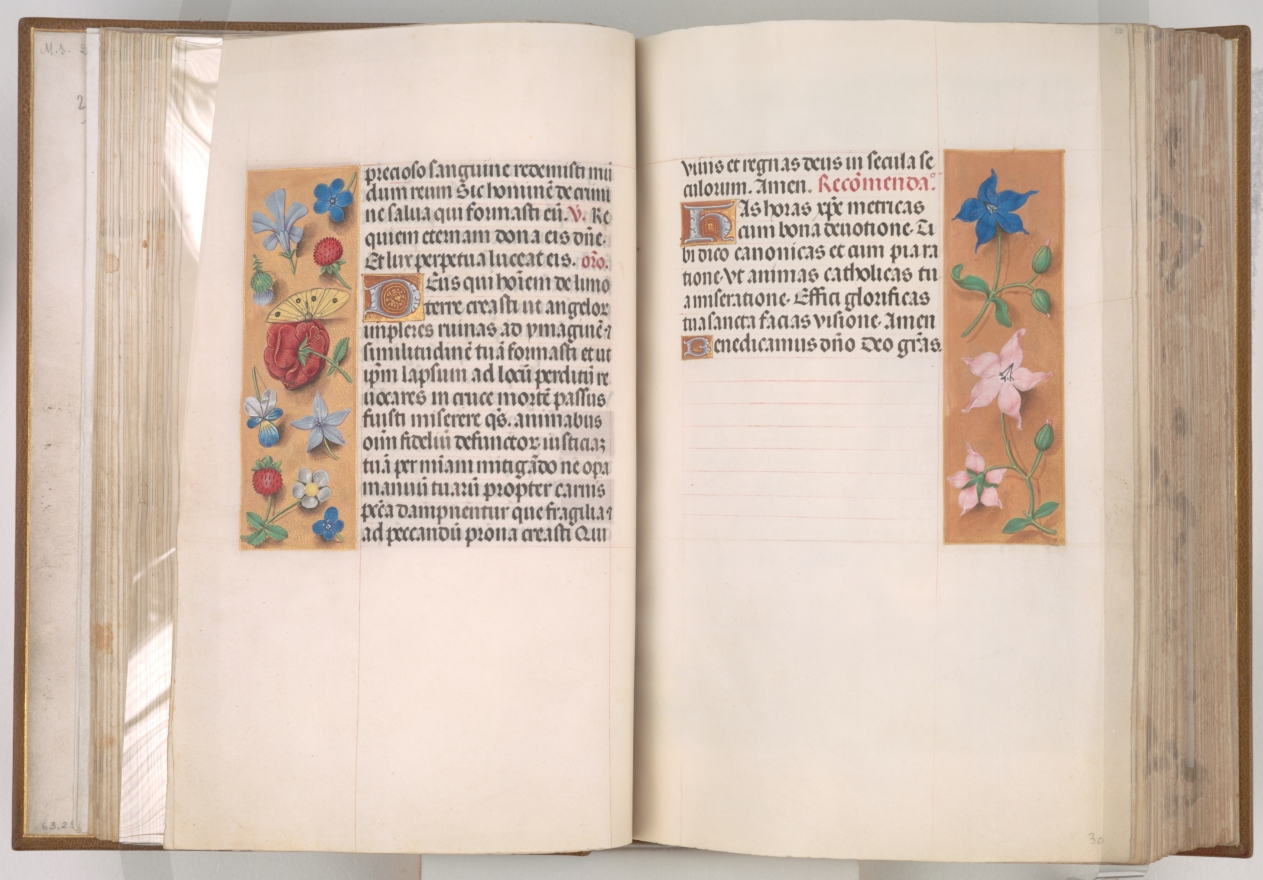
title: Hours of Queen Isabella the Catholic, Queen of Spain: Fol. 29v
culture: Flanders, Ghent and Bruges, late 15th century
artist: Master of the First Prayerbook of Maximillian (Flemish, c. 1444–1519)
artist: and Associates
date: c. 1500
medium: ink, tempera, and gold on vellum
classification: Bound Volume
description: A great lover of Flemish art, Queen Isabella treasured her many devotional books. This deluxe manuscript was created for her private devotions by highly organized and distinctly talented manuscript painters active in Ghent and Bruges. The Ghent-Bruges school represents the culmination of Flemish book painting, whose main features were the use of rich colors, illusionistic effects, a love of landscape, and a strong sense of visual narrative. Manuscripts produced by this circle of artists are renowned for their border decoration featuring a rich variety of realistically painted flowers, scrolling acanthus leaves, birds, and butterflies.